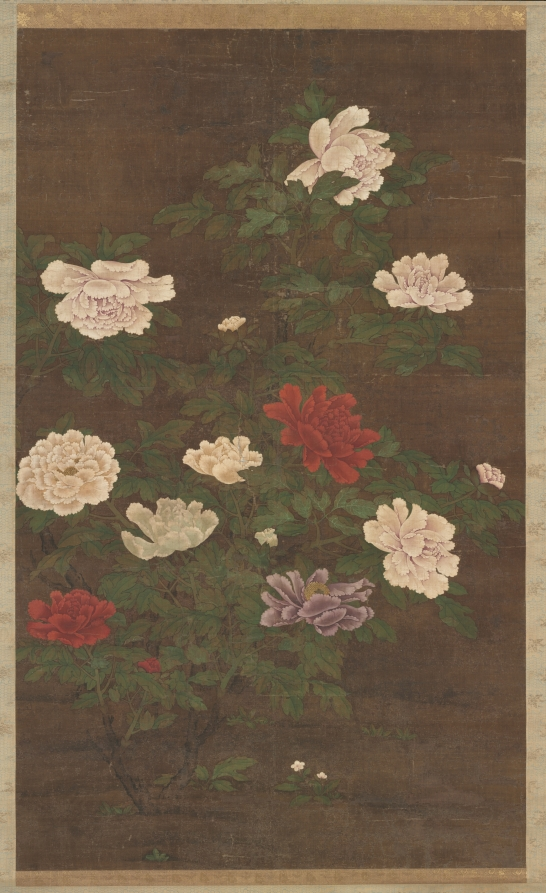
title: Peonies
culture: China, Yuan dynasty (1271-1368)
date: late 1200s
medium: hanging scroll, ink and color on silk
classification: Painting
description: In China, the peony is considered the Queen of Flowers, representing the late spring season. The shrubs of this tree peony are in full bloom, blossoming in various colors. Peony paintings were popular from the Southern Song period to the Ming dynasty. The large scale of this decorative scroll suggests that it may have been hung in a reception hall, conveying good wishes for wealth and prosperity.